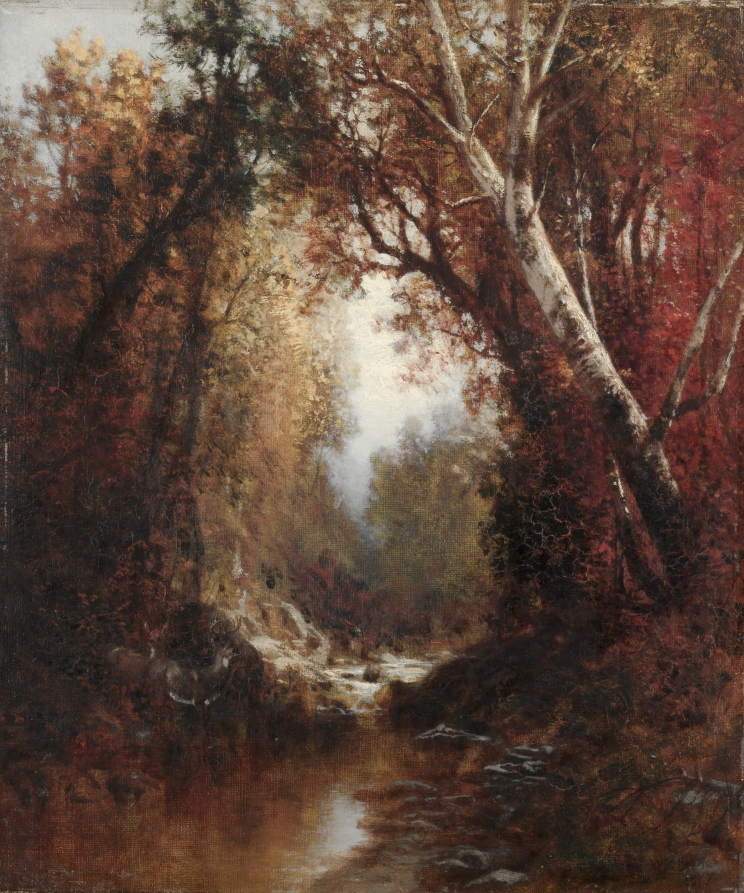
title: Autumn Scene in the Adirondacks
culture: America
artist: William Hart (American, born Scotland, 1823–1894)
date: 1877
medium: oil on canvas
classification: Painting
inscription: signed lower right: WM. HART. / 1877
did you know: Hart was the grandfather of author E. B. White.